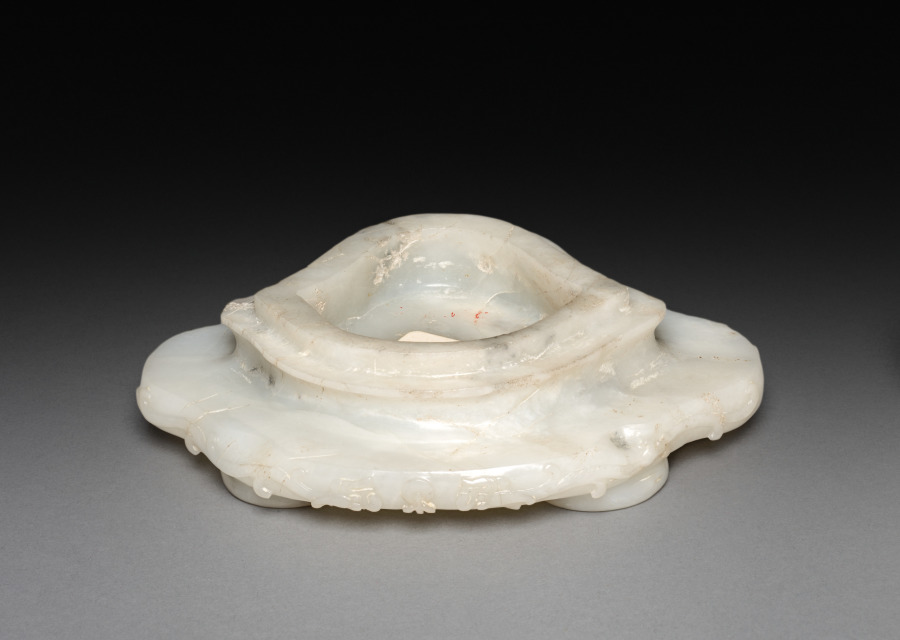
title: Three-Sectional Altar Group: Koro (bottom section of base)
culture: China, Qing dynasty (1644-1911)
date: 1644–1911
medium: jade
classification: Jade